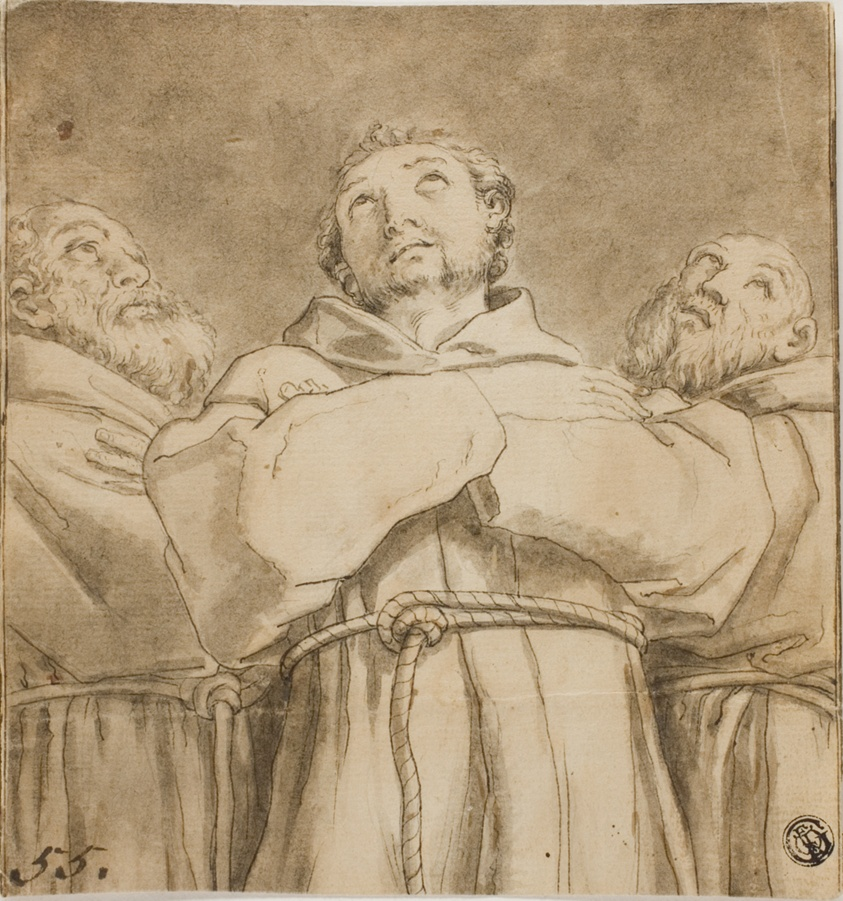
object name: Drawing and Watercolor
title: Saint Francis of Assisi, with two Monks of his Order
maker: After Guido Reni; Italian, 1575-1642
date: after 1611/12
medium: Pen and brown ink, with brush and gray and brown wash and traces of graphite, on cream laid paper, laid down on tan laid paper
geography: Italy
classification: ink or chalk wash; drawings (visual works); prints and drawing